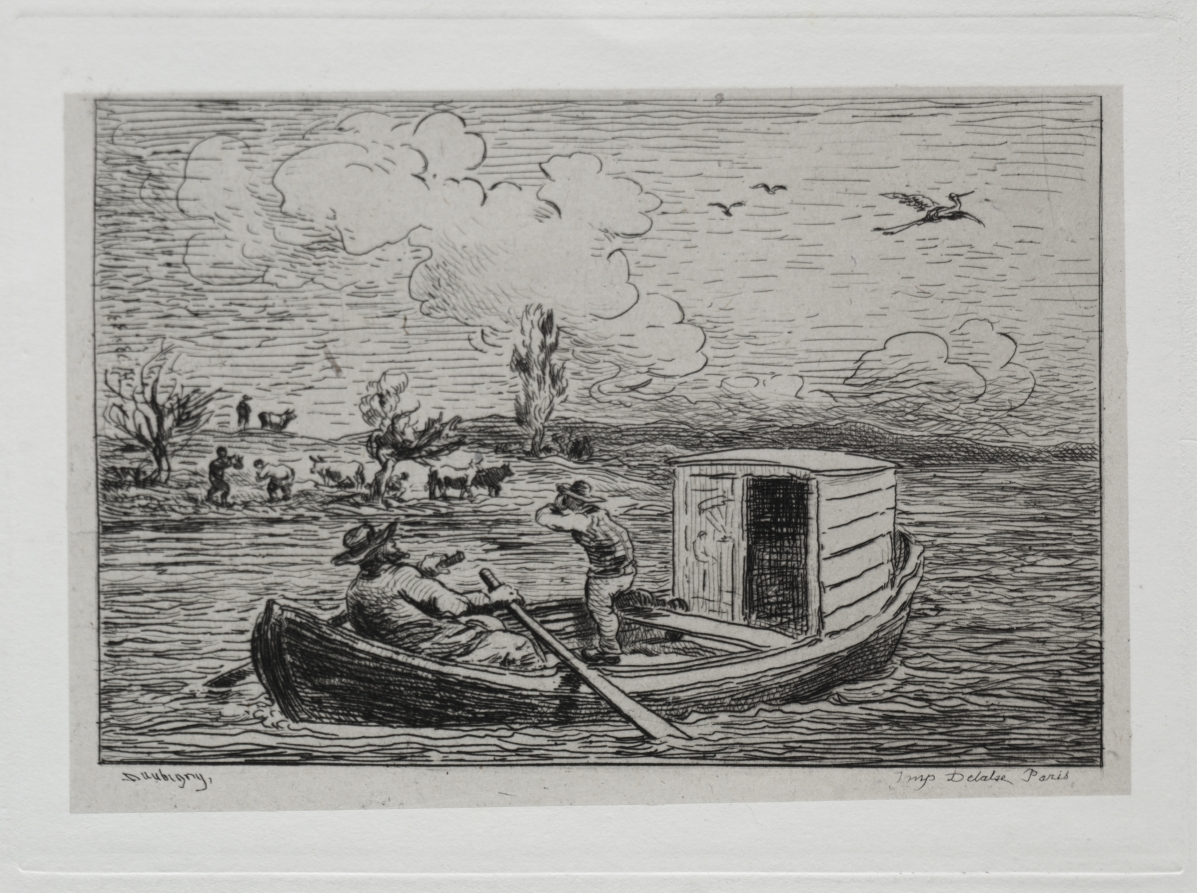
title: The Boat Trip: Le Mot de Cambronne (The Slanging Match)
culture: France, 19th century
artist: Charles François Daubigny (French, 1817–1878)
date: 1861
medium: etching with chine collé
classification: Portfolio